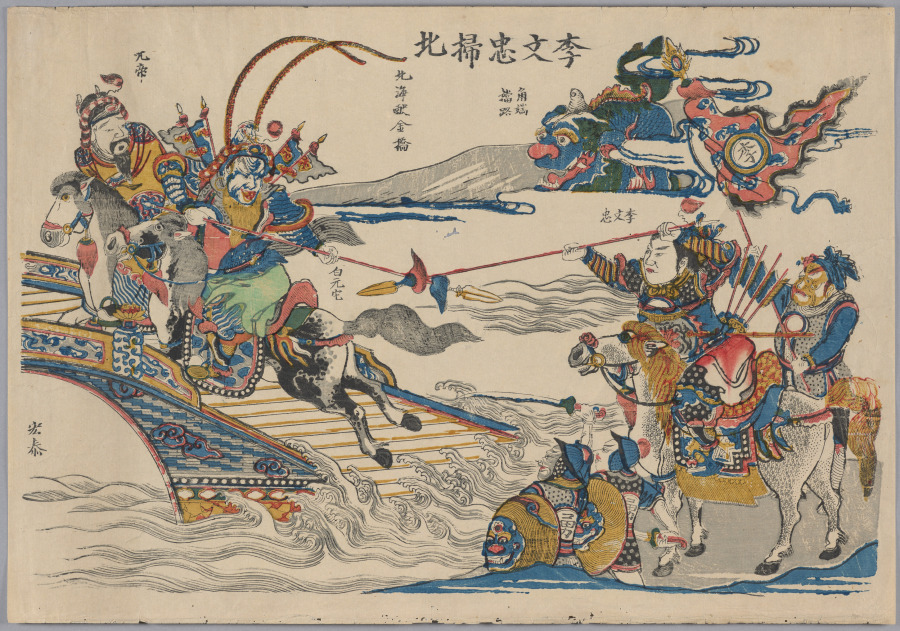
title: Li Wenzhong Clears the North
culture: China, Qing dynasty (1644–1911), Jiaqing period (1796–1820)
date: 1796–1820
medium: Polychrome woodblock print; ink and color on paper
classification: Print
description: In the 1600s, printing flourished in such Jiangnan cities as Nanjing, Suzhou, Hangzhou, and Huizhou, evolving from privately enjoyed illustrated books printed in color to more commercialized single-sheet color prints that were hung on walls and became part of the rich urban visual culture.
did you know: Woodblock printing in color reached a height in China in the 1600s to 1700s. The prints were executed by means of sets of separate blocks, each carved to print a different color.